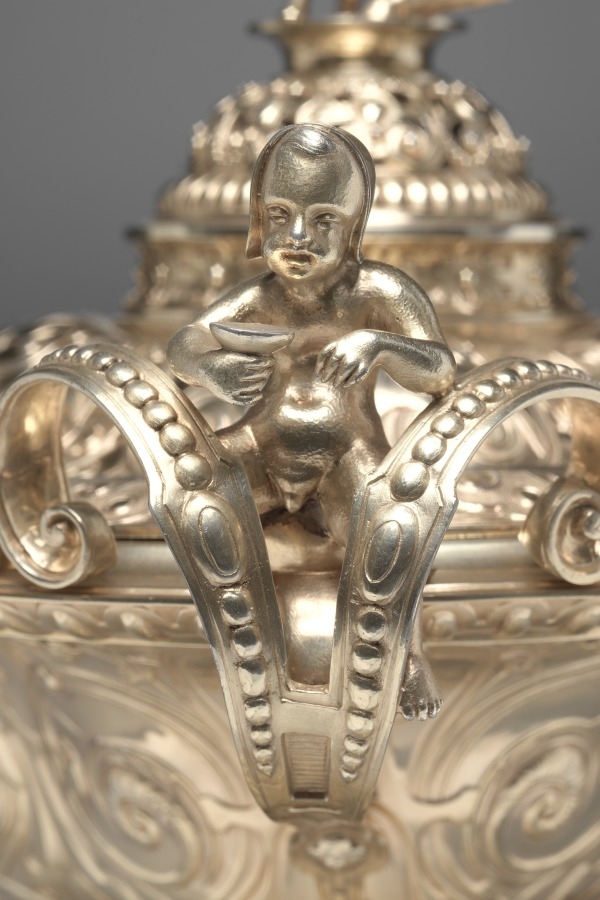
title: Centerpiece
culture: France, 19th century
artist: Charles-Nicolas Odiot (French, 1826–1868)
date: 1838–1848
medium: silver gilt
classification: Metalwork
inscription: engraved inside base: "ODIOT ORFEVRE DU ROI A PARIS"; engraved beneath crowns: "LP" (conjoined for King Louis Philippe of France).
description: Made for Louis Philippe (1773-1850), King of France 1830-48.